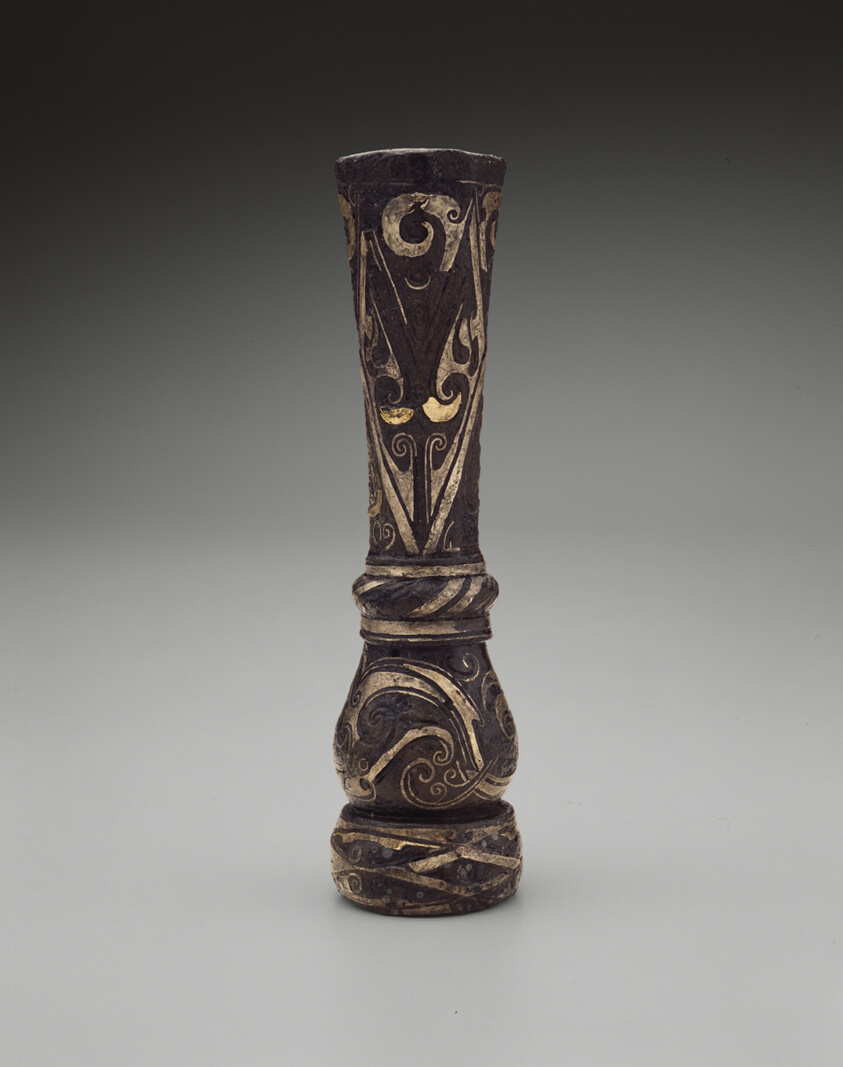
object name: Decorative Arts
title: Tubular Fitting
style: Chinese (culture or style)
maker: China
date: Eastern Zhou dynasty, Warring States period (480–221 B.C.), 4th/3rd century B.C.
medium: Bronze inlaid with gold and silver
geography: China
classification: bronze; metal; fitting; asian art; decorative arts